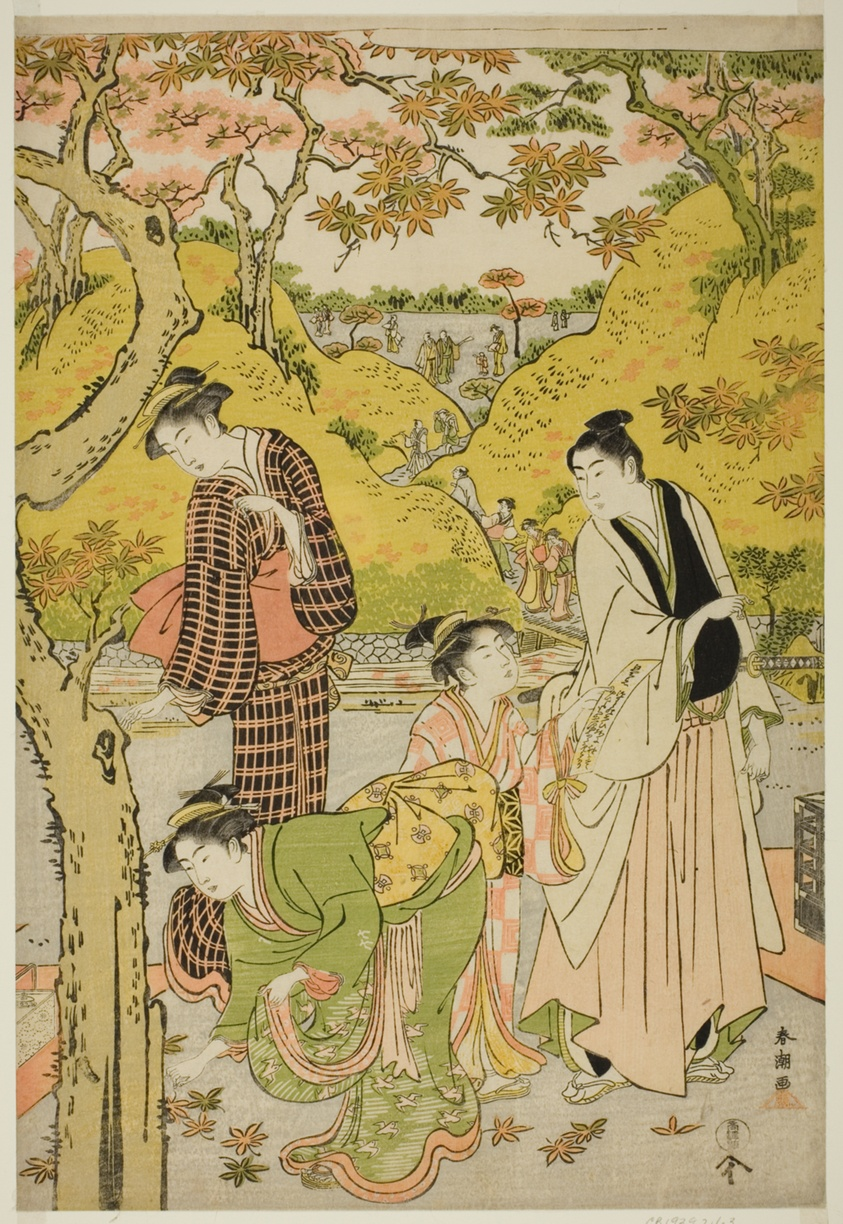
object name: Print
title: Picnic in Autumn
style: Japanese (culture or style)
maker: Katsukawa Shuncho; Japanese, active c. 1780-1801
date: late 1780s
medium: Color woodblock print; right sheet of oban triptych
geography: Japan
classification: woodblock print; print; asian art